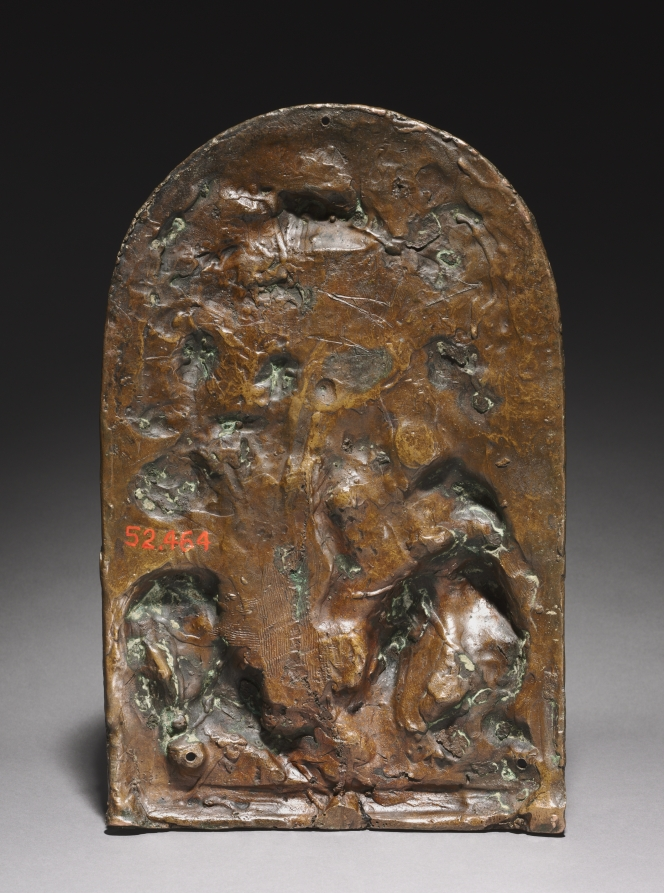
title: Feast of the Gods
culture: Italy, 16th century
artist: probably by Alessandro Vittoria (Italian, 1525–1608)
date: c. 1571–1578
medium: bronze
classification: Sculpture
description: Banquets of the gods were common literary devices in classical texts and myth, and their use here enmeshed with the desire to capture the sensuality of the body and water in motion.